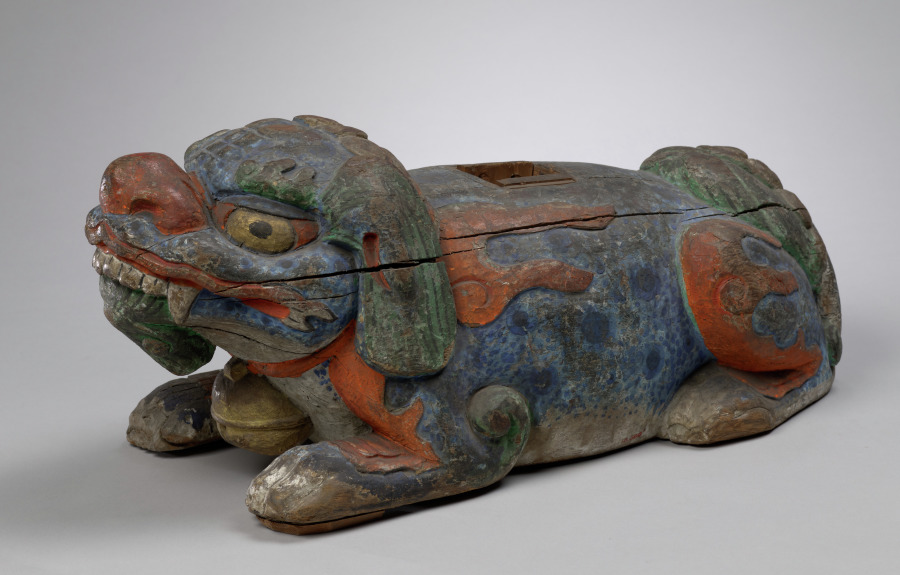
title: Base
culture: Korea, Joseon dynasty (1392–1910)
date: 1392–1897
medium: wood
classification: Arms and Armor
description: This wooden base for a musical instrument, possibly a set of bells or drums, was acquired in Korea in 1916 by Langdon Warner, who once served as the field agent for Asian art for the Cleveland Museum of Art. At the time of acquisition, it was mistaken as a part of a clothing stand related to a set of military uniform (1918.560.1) probably because the wooden base and a set of military uniform were purchased at the same antique shop.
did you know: It was a base of a musical instrument, such as a set of bells or drums.